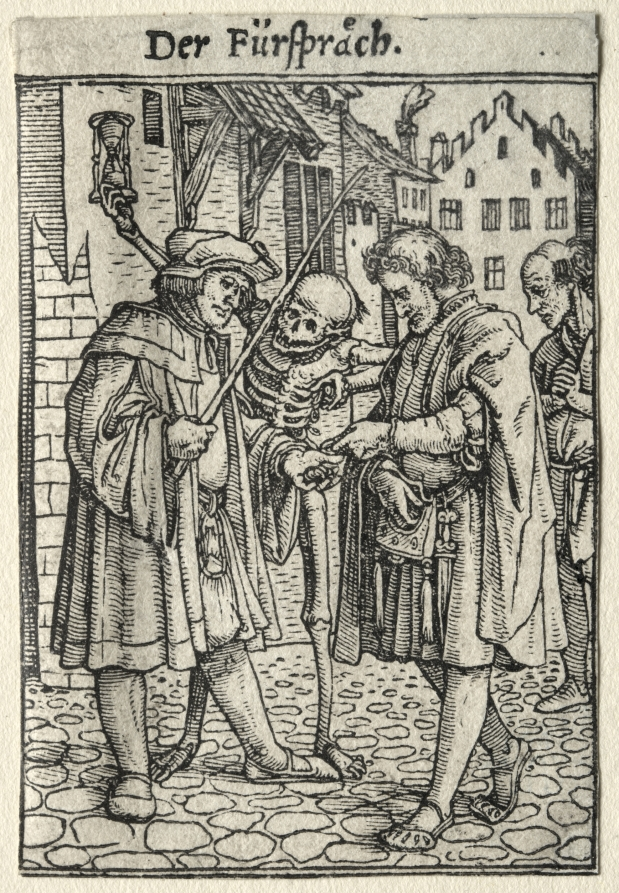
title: Dance of Death: The Advocate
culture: Germany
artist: Hans Holbein the Younger (German, active England and Switzerland, 1497/98–1543)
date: c. 1526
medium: woodcut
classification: Print